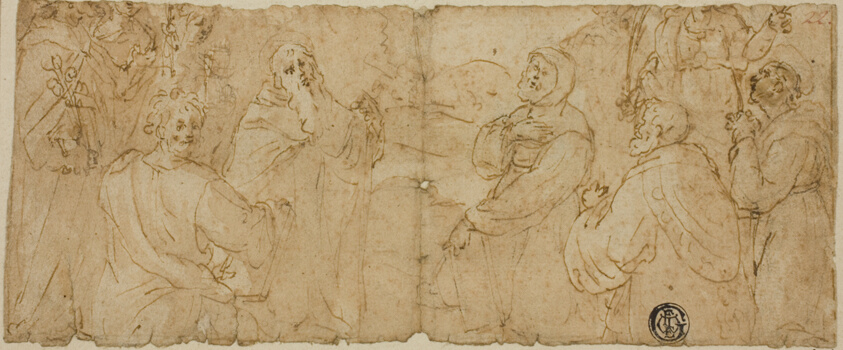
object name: Drawing and Watercolor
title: Franciscan Saints in Adoration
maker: Unknown Artist; Italian, late 16th century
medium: Pen and brown ink with brush and pale brown wash, over traces of black chalk, on tan laid paper, laid down on cream wove card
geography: Italy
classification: ink with wash; drawings (visual works); prints and drawing